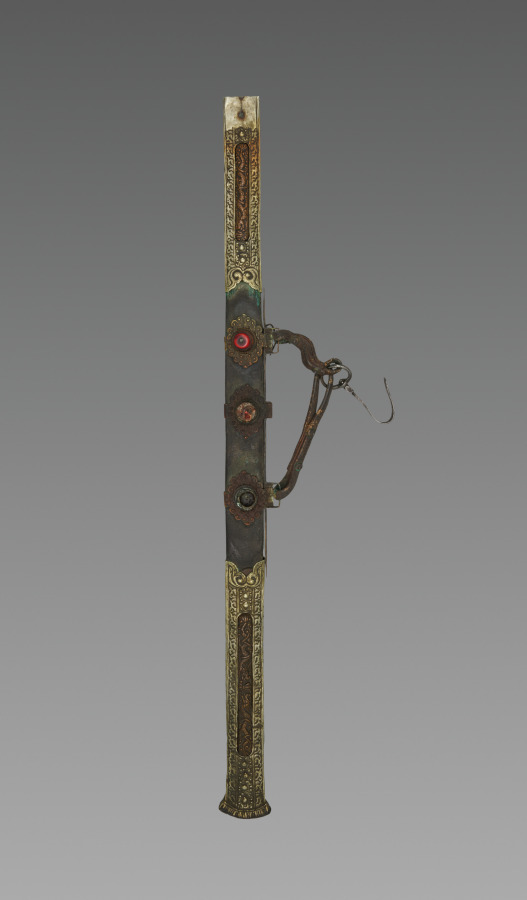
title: Scabbard for Sword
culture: Tibet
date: 1800s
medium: iron and silver with bone, turquoise, leather and brass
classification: Arms and Armor